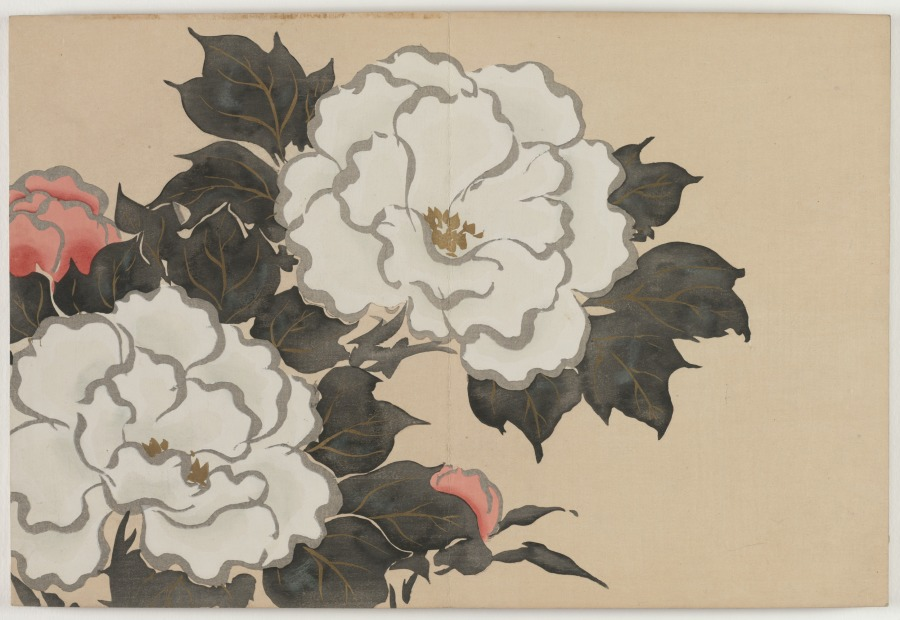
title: Flowers of a Hundred Worlds (Momoyogusa): Peonies (Fukamigusa)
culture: Japan, Meiji period (1868–1912)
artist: Kamisaka Sekka (Japanese, 1866–1942)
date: 1909–10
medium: color woodcuts with gold and silver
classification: Bound Volume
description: This print from a set of three woodblock printed albums displays the graphic design prowess of Kamisaka Sekka. The images were first distributed one by one to subscribers to the series but later were reissued in bound form, like this book, for mass consumers. Each print features a vignette taken from nature or Japanese literature. Many of the scenes have a long history in Japan, originating in the 900s or 1000s and having been interpreted by all manner of artists since that time. Sekka’s selections hew closely to precedents from the Rinpa style originated by painter Tawaraya Sōtatsu (c. 1570–c. 1640) and calligrapher Hon’ami Kōetsu (1558–1637).